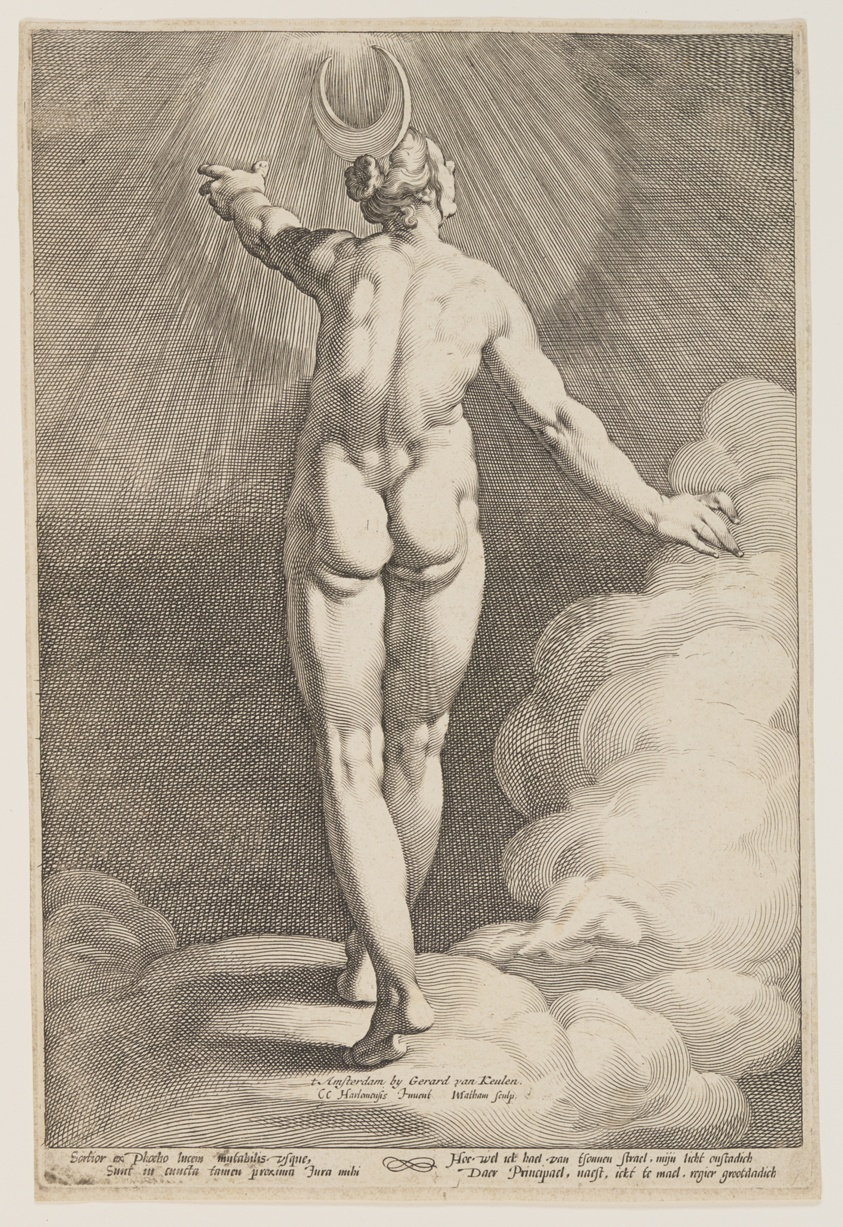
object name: Print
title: Diana in the Clouds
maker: Jacob Matham (Dutch, 1571–1631); after Cornelis van Haarlem (Dutch, 1562-1638)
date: c. 1600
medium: Engraving on ivory laid paper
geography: Netherlands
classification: print; paper; prints and drawing; engraving